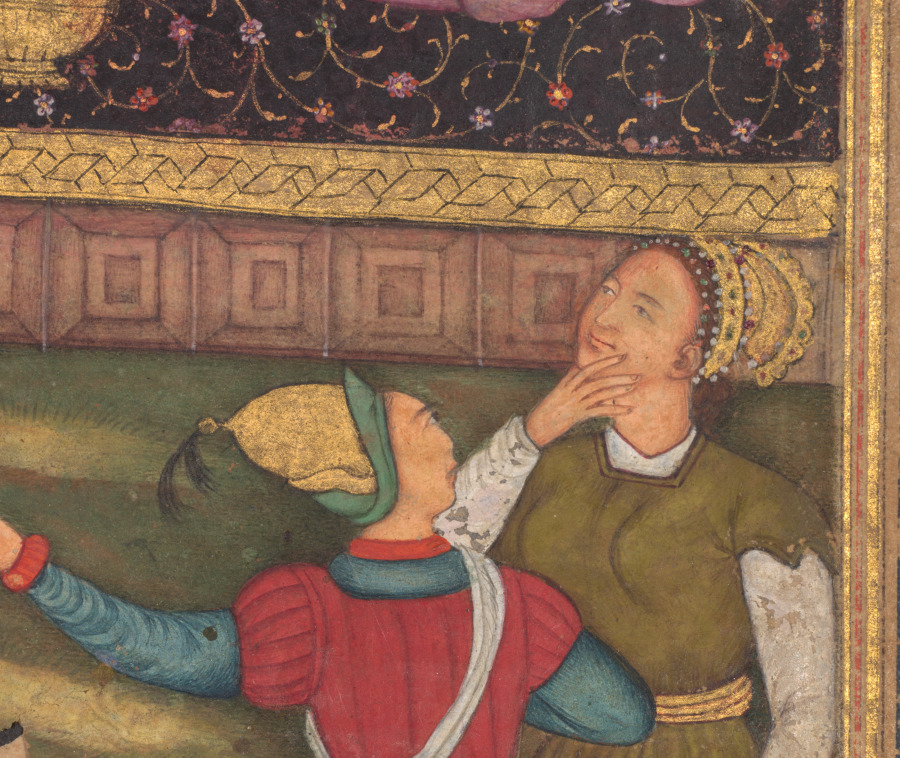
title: The Annunciation (folio 15 recto), from a Mirror of Holiness (Mir’at al-quds) of Father Jerome Xavier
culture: Mughal India, Allahabad, made for Prince Salim (1569–1627)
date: 1602–4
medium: Gum tempera, ink, and gold on paper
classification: Manuscript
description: Mary gazes down at the angel Gabriel as he kneels reverently, like a humble messenger, delivering the news that Mary will give birth to the son of God. His multicolored wings are forced within the boundary line of the painting field, visually implying a sense of subordination. Unlike many of the paintings in the Mirror of Holiness, the Annunciation is a familiar subject in European art, but the emphases vary. The Indian version depicts her as a queen, with a crown held above her head and attendants standing by.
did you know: The text states that Mary was only age 13 1/2 when the angel Gabriel came to her.